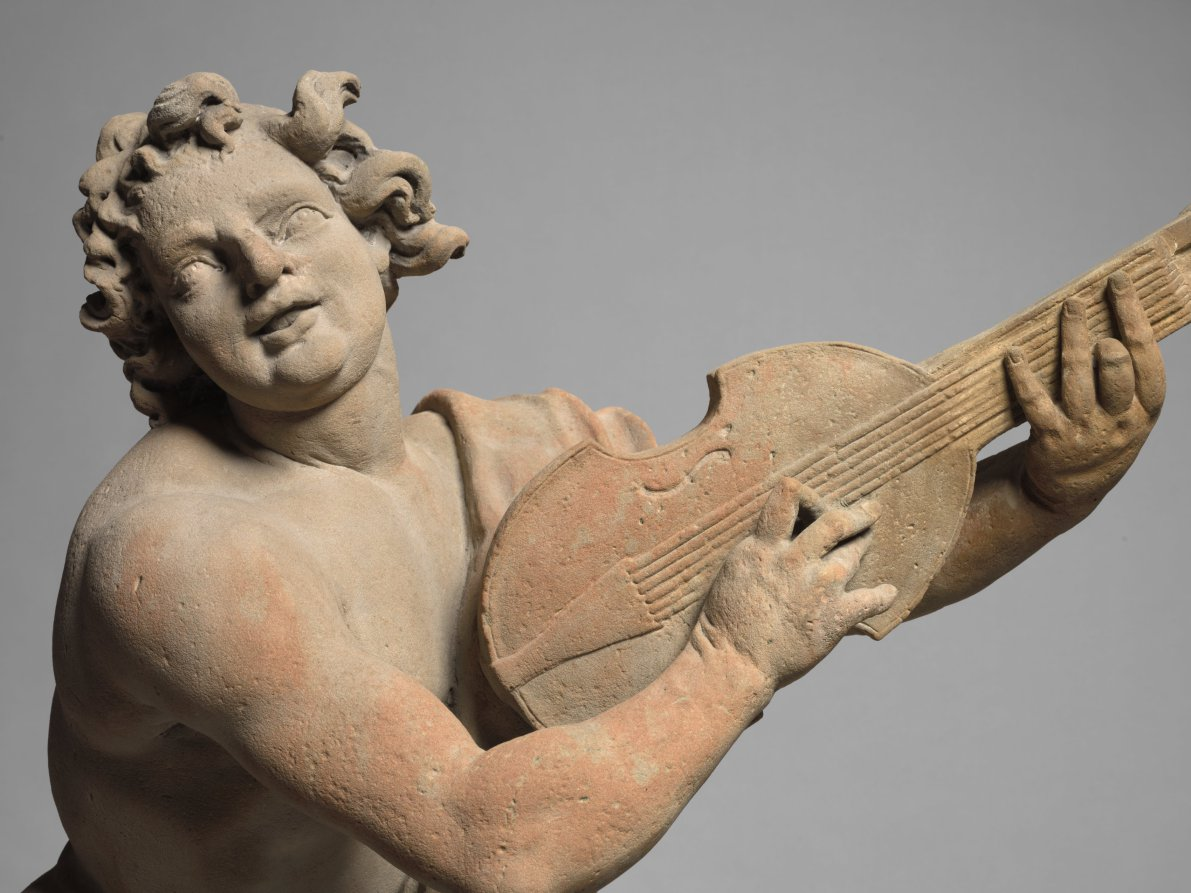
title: Orpheus and Cerberus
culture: Germany, near Bamberg, 18th century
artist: Ferdinand Tietz (Austrian, 1708–1777)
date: c. 1765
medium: sandstone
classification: Sculpture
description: This work was one of numerous sculptures Tietz created for the gardens of Schloss Seehof, near Bamberg in Bavaria (Germany), the summer residence of the Prince Bishops of Bamberg. The exaggerated forms of Orpheus's face and musculature caricature the idealized proportions of classical sculpture. A further parody exists with his companion: the usually terrifying hound Cerberus is here nothing more than a docile puppy, sitting calmly at Orpheus's feet. Meant to be viewed outdoors, on a high pedestal and from a distance, this work is less finely detailed than sculptures Tietz made for indoor settings at Seehof.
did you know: Taught to play the lyre by the Greek god Apollo, Orpheus's legendary musical abilities had the power to charm animals.